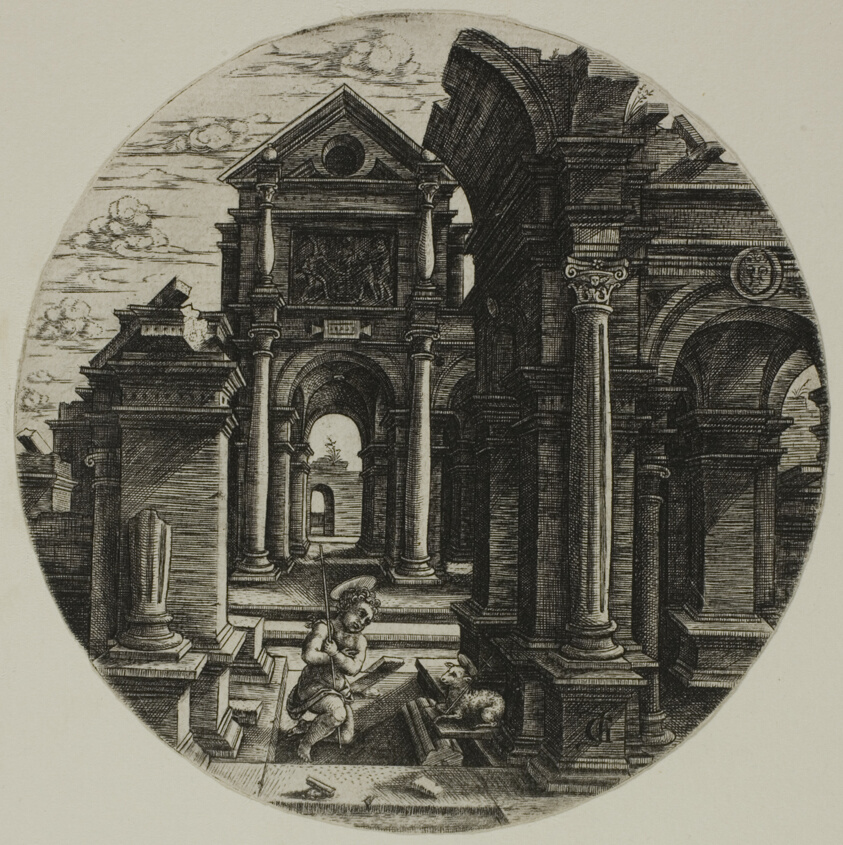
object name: Print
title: The Infant John the Baptist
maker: Jean de Gourmont (French, 1506-1551)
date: 1520/30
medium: Engraving in black on ivory laid paper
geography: France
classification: engraving; print; prints and drawing